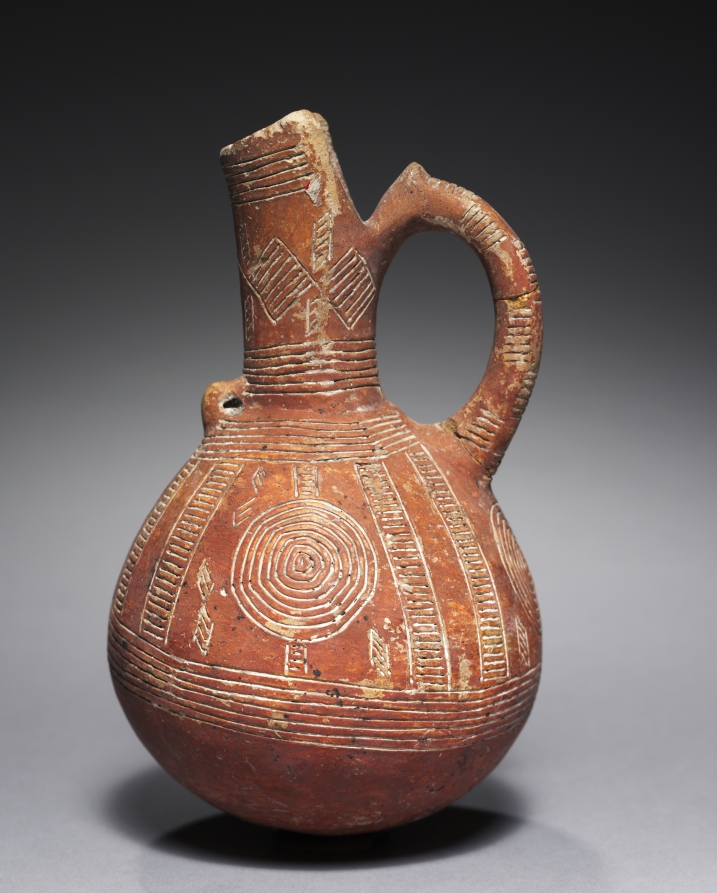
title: Jug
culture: Cyprus, Alambra or Ayia Paraskeve, early Cypriot III-middle Cypriot I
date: c. 2000–1800 BCE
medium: red ware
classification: Ceramic